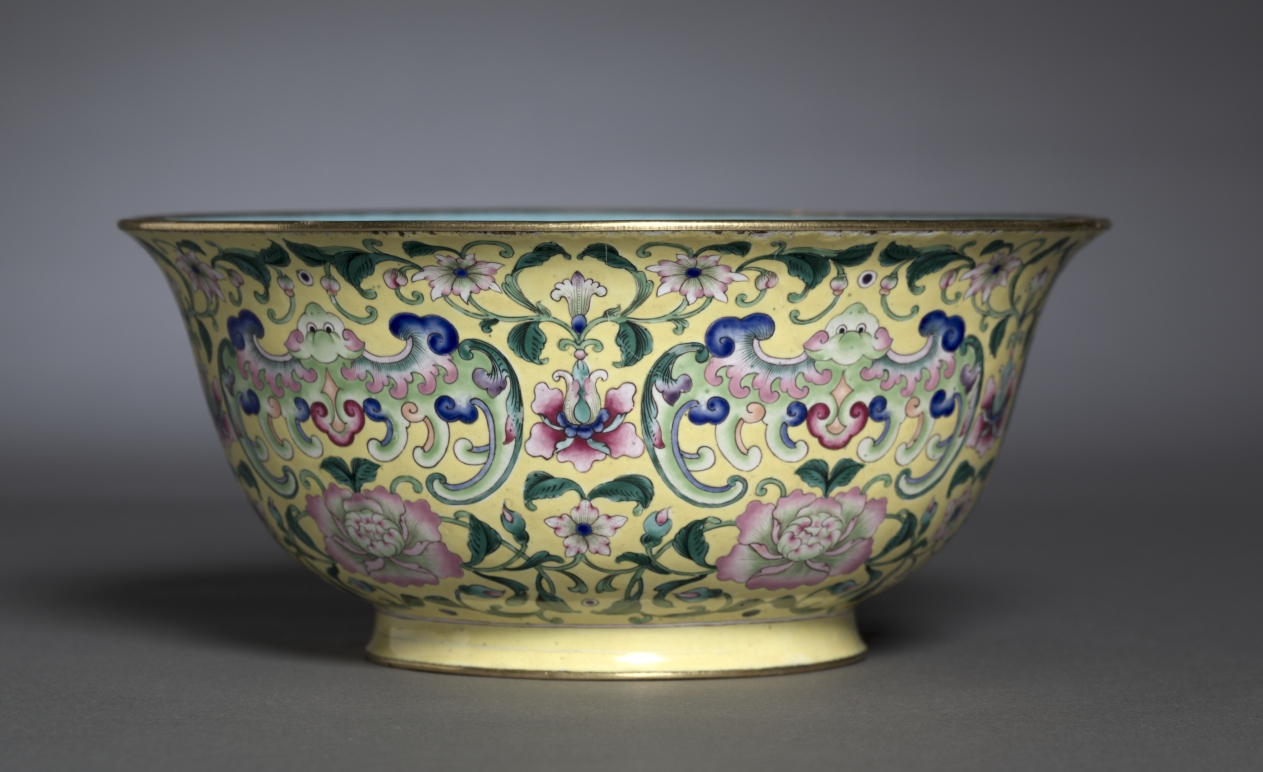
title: Bowl with Bats and Floral Scrolls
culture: China, Qing dynasty (1644–1911), Qianlong reign (1736–95)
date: 1736–95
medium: Canton enamel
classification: Enamel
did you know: The bat is a lucky symbol as the Chinese word for bat, 蝠 fú, is pronounced the same as “good fortune” 福.